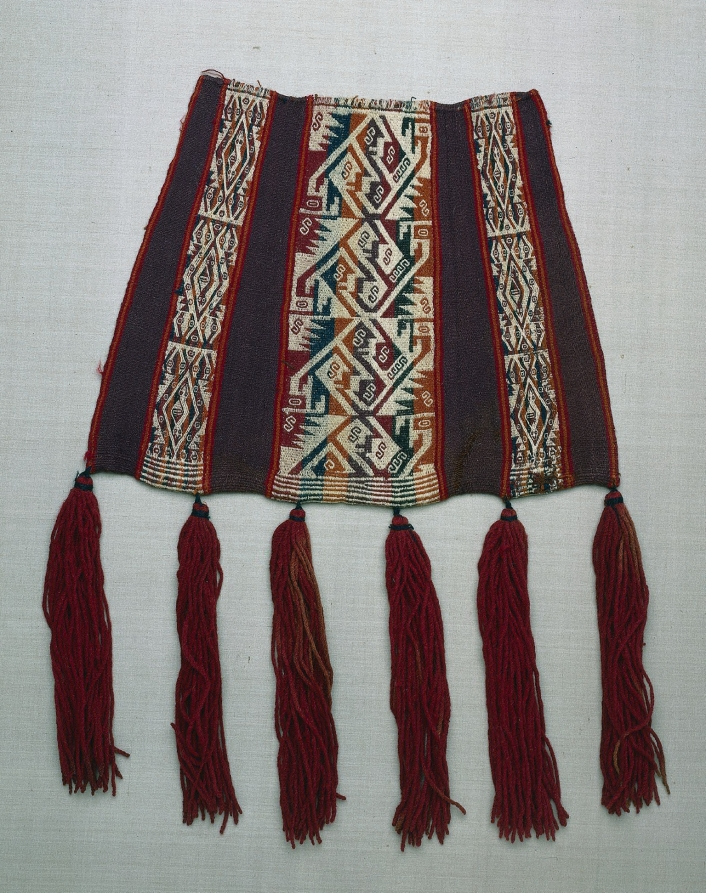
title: Trapezoidal Bag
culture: Peru, South Coast, Arica culture, or Chile, North Coast, 13th-15th century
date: 1200–1400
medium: alpaca wool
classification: Textile